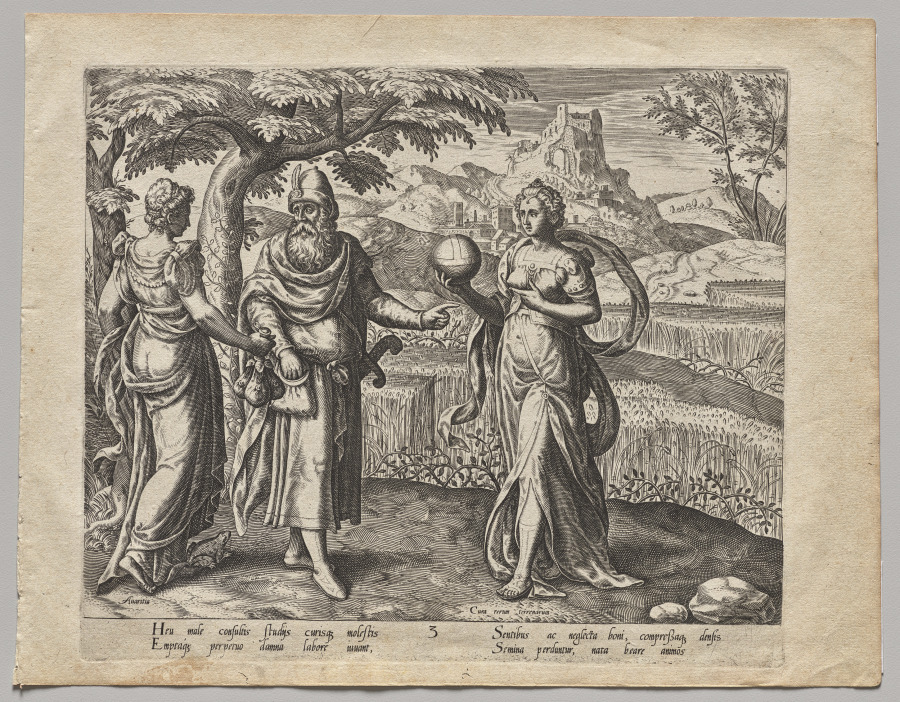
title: The Seed Received among the Thorns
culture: Netherlands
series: Parable of the Sower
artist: Philip Galle (Flemish, 1537–1612)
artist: after Gerard P. van Groningen (Netherlandish, active late 1500s)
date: 1574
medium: engraving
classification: Print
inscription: Watermark not identified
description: This is one of a series of four prints portraying the biblical parable of the sower, made in Antwerp (in present-day Belgium) at the end of the 1500s. The parable compares types of soil to people in the world: one hardened; one fickle; one distracted by things of the world; and one with an open heart, ready to accept God. The third sower (here, portrayed as a pilgrim) distractedly throws seeds among thorns. He is surrounded by two female personifications—Cares of the World, and Avarice (extreme greed for money)—indicating the source of his distraction from religious piety. This print relates to a preparatory drawing in the museum’s collection (2012.4).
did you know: The female figure at left, representing Avarice, carries a large, laden moneybag in her right hand.